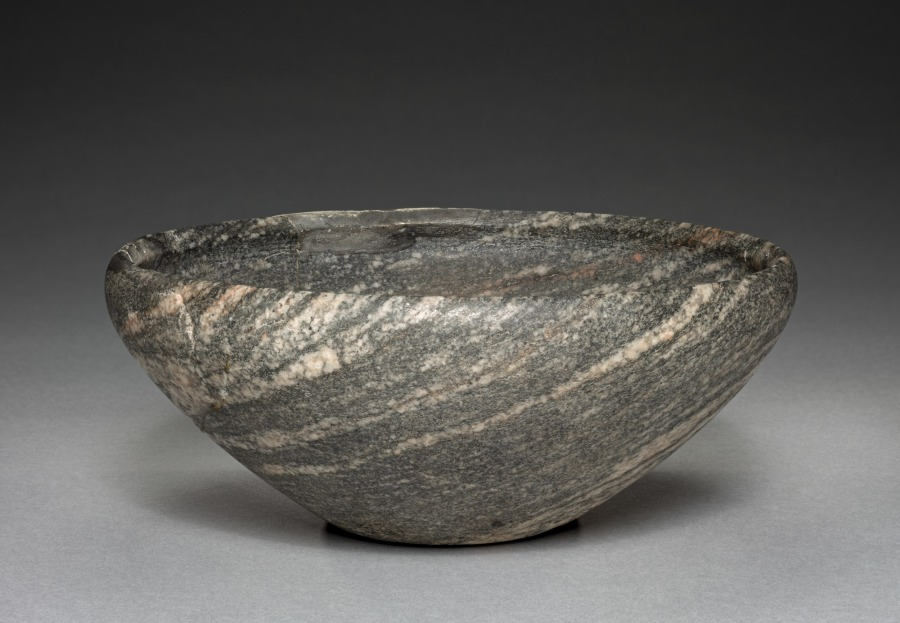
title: Bowl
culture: Egypt, Early Dynastic (2950–2647 BCE), Dynasty 2, reign of Nynetjer (c. 2700 BCE) or later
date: 2770–2647 BCE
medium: anorthosite gneiss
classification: Vessels